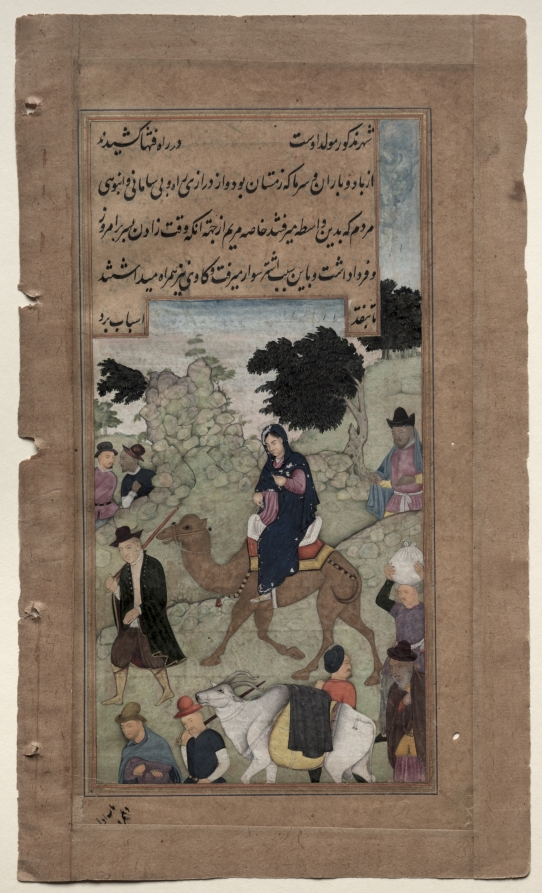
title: Mary and Joseph Travel to Bethlehem (folio 24 verso), from a Mirror of Holiness (Mir’at al-quds) of Father Jerome Xavier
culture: Mughal India, Allahabad, made for Prince Salim (1569–1627)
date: 1602–4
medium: Gum tempera, ink, and gold on paper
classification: Manuscript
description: Joseph leads the heavily pregnant Mary riding on a camel. In the text Father Jerome wrote that Mary rode a “pack beast,” so the Indian artist opted to portray her on a camel. An ox in the foreground carries their belongings, and the bent trees indicate the journey’s harsh conditions. They are on the way to Bethlehem, the city of King David, from whom Joseph was descended, in order to register for a census. Father Jerome often emphasized the royal lineage of Jesus, apparently in an effort to impress the Mughals.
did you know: Wearing a green coat, Joseph carries a sword over his shoulder, suggesting that he is ready to face any potential trouble.